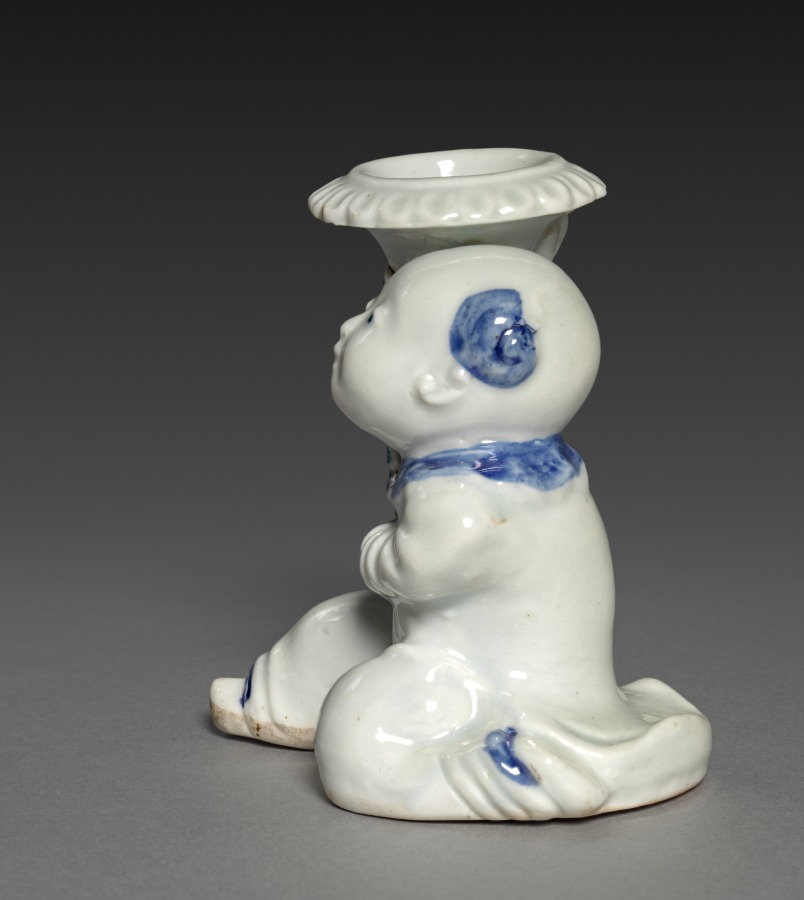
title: Kneeling Boy Holding a Vase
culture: Japan, Edo period (1615–1868)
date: 1700s-1800s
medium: porcelain, molded and carved, with underglaze blue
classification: Ceramic